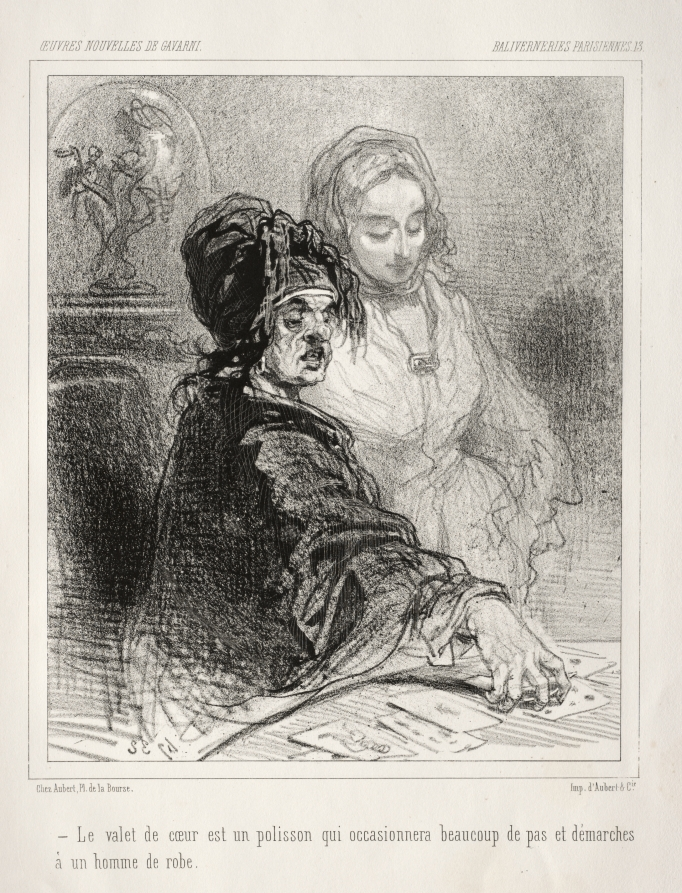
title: Baliverneries Parisiennes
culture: France, 19th century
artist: Paul Gavarni (French, 1804–1866)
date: c. 1847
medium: lithograph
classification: Print